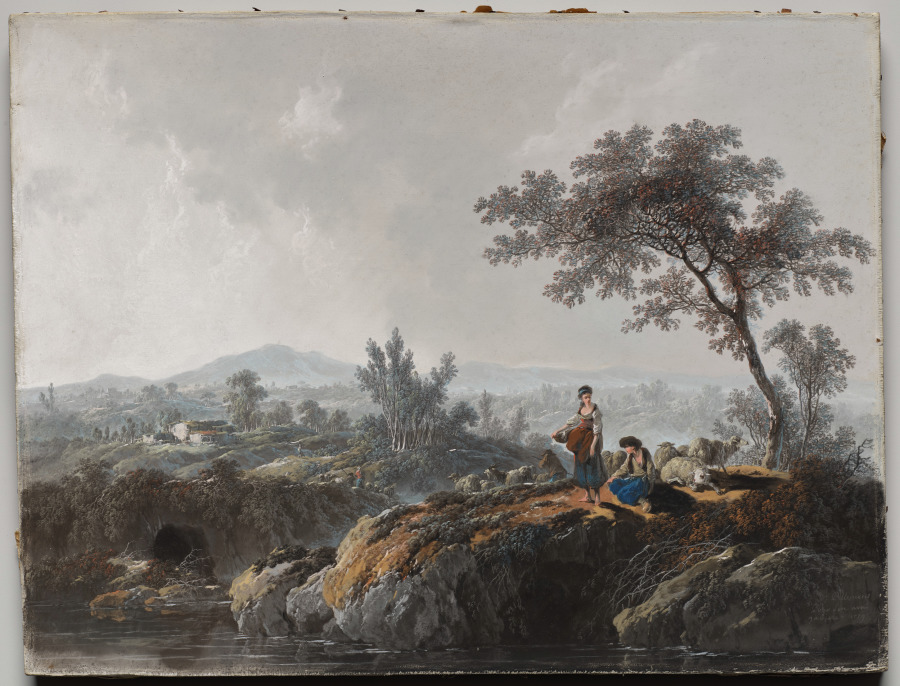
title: Shepherds in a Landscape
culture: France, 18th century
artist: Jean Baptiste Pillement (French, 1728–1808)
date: 1779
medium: pastel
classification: Drawing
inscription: Signed lower right: "J. Pillement / Pour son ami / gavines 1779"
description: The exquisite handling of the pastel, crisp and colorful in the foreground while of the greatest subtlety in the atmospheric distance, bears out Pillement's reputation as the best 18th-century French artist of the pastel landscape. Landscapes in this period were most often picturesque creations, rather than literal transcriptions of nature. In this dramatically irregular countryside, shepherds, flocks, and rustic buildings create an air of idealized rural charm.